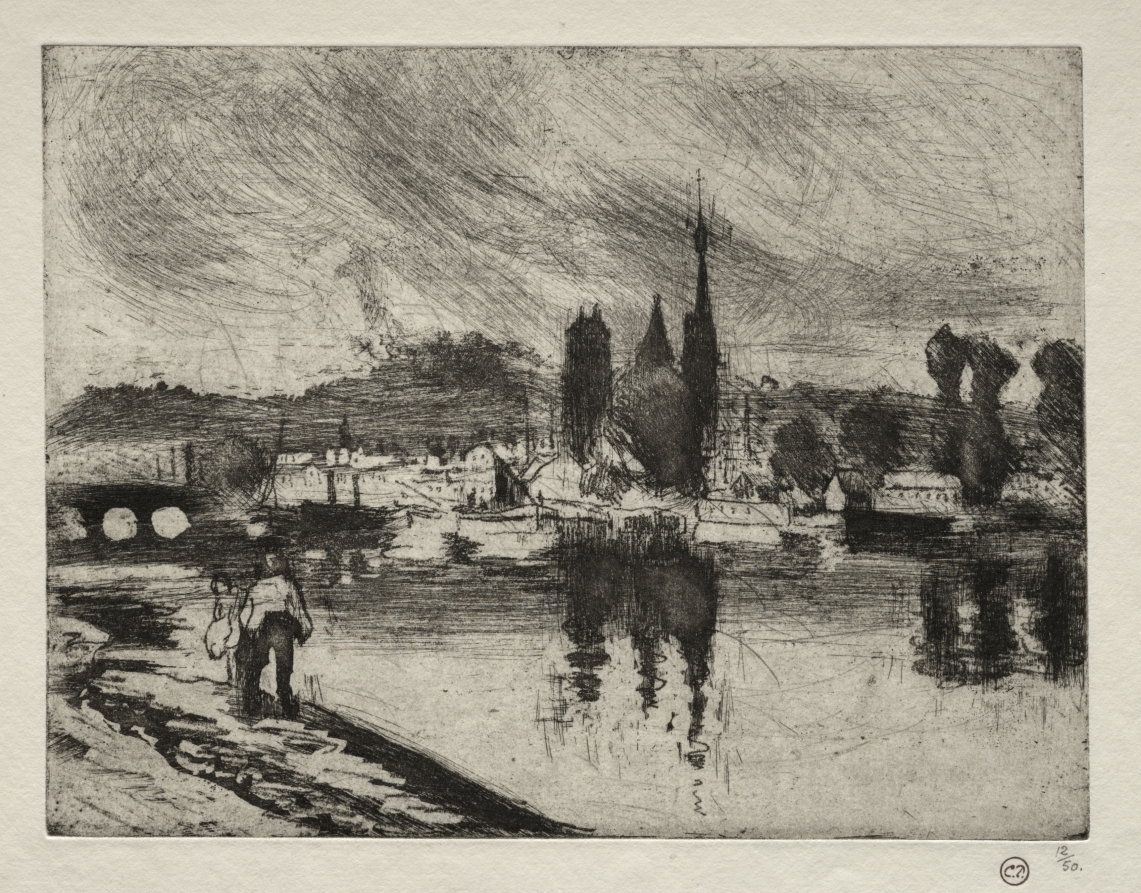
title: View of Rouen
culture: France, 19th century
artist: Camille Pissarro (French, 1830–1903)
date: 1884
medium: etching and soft-ground etching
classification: Print